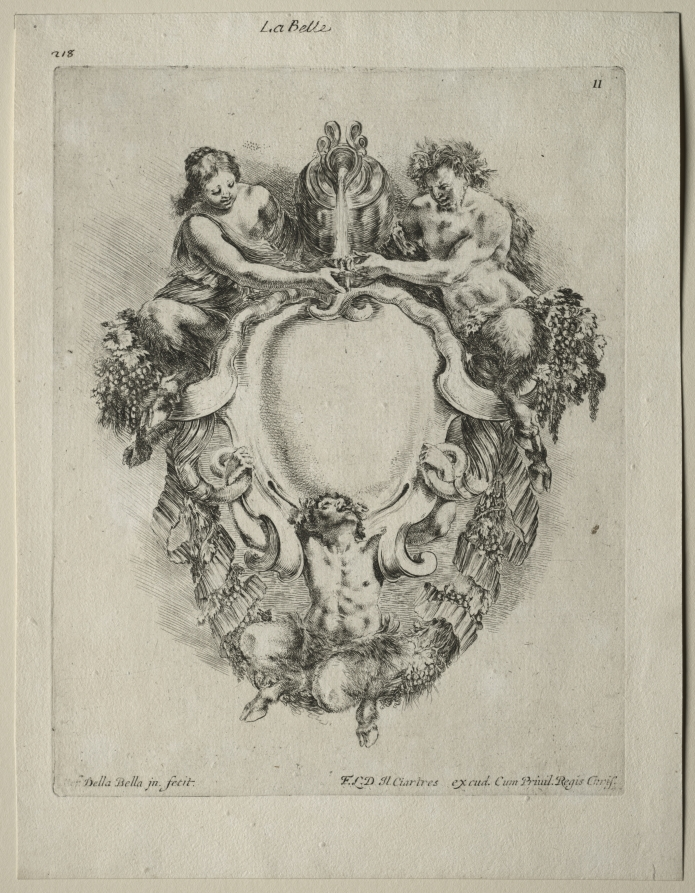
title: Collection of Various Caprices and New Designs of Cartouches and Ornaments: No 11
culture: Italy, 17th century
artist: Stefano Della Bella (Italian, 1610–1664)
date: 1646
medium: etching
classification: Print